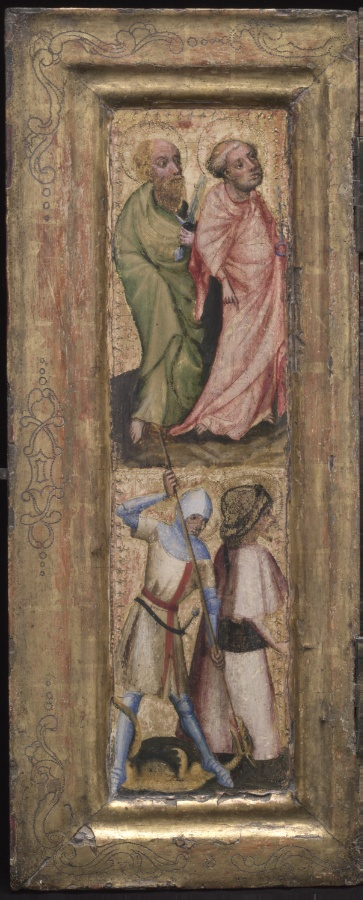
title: St. Peter, St. Paul, St. George, and St. James the Greater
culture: Austria, Salzburg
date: c. 1424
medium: tempera and gold on wood (oak)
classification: Painting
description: One wing of a small altarpiece, called a triptych, was undoubtedly made for private use.